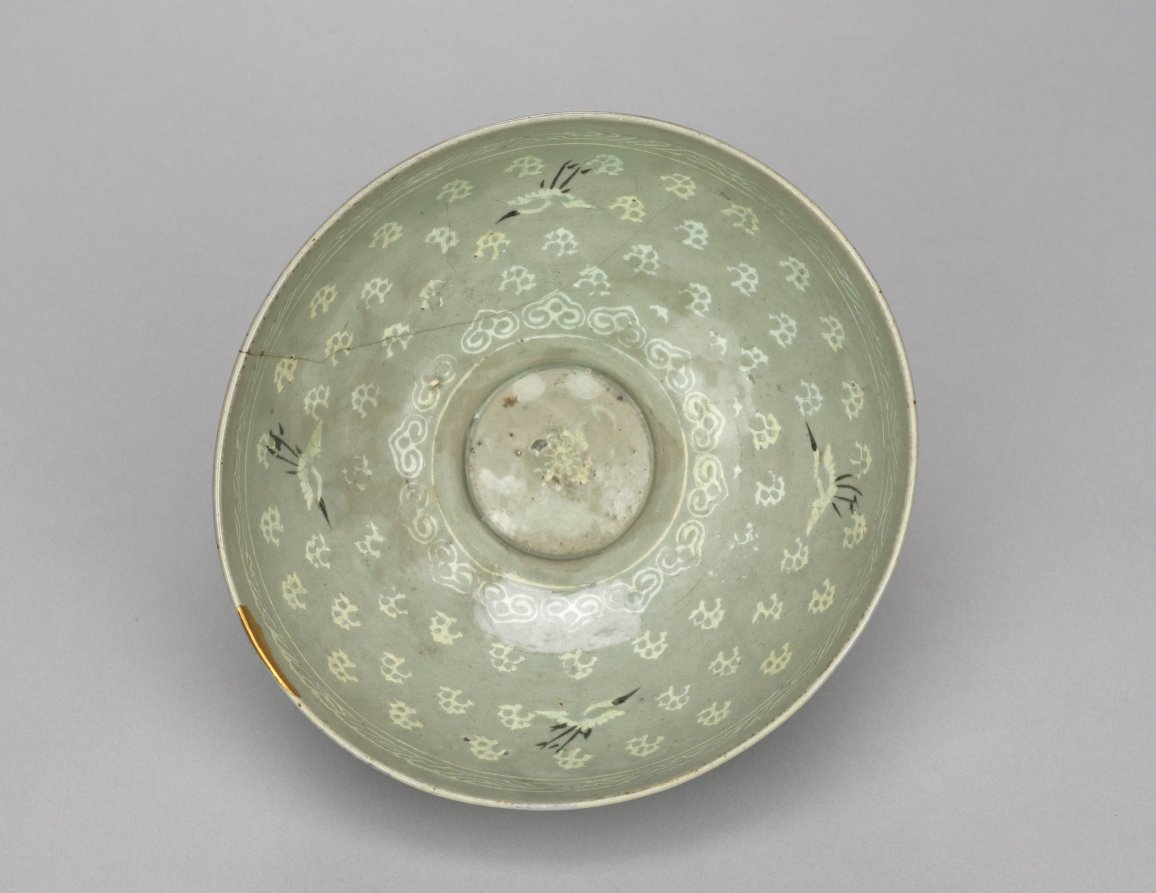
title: Bowl with Inlaid Cranes and Clouds Design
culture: Korea, Goryeo dynasty (918–1392)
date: 1200s-1300s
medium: pottery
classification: Ceramic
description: As early as the seventh century, the practice of drinking tea and wine became an important part of elite leisure culture in Korea. A wide bowl like this example was especially suitable for drinking powdered tea shaved from a compressed tea cake, the most commonly enjoyed type during the Goryeo period. The image of flying cranes amid clouds that decorate the inner wall of this tea bowl is considered an auspicious sign particularly about the king's good governance.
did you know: An actual event in 1121, which constitutes a groups of cranes hovering above the palace in Kaifeng, the capital of the Chinese Northern Song dynasty, soon became internationally recognized as a heavenly sign about the ruler's virtuous governance.